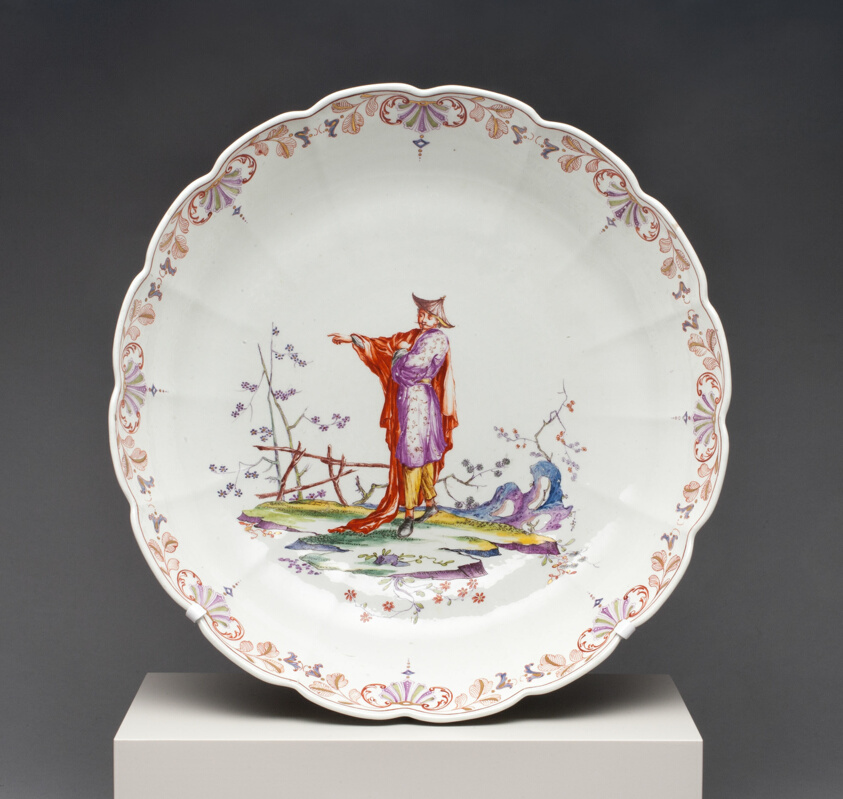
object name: Ceramics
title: Plate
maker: Du Paquier Porcelain Manufactory (Austrian, 1718–1744)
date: 1730–35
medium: Hard-paste porcelain, polychrome enamels, and gilding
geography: Vienna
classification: plate (general, dish); tableware; dish (vessel); ceramics; porcelain; european decorative arts